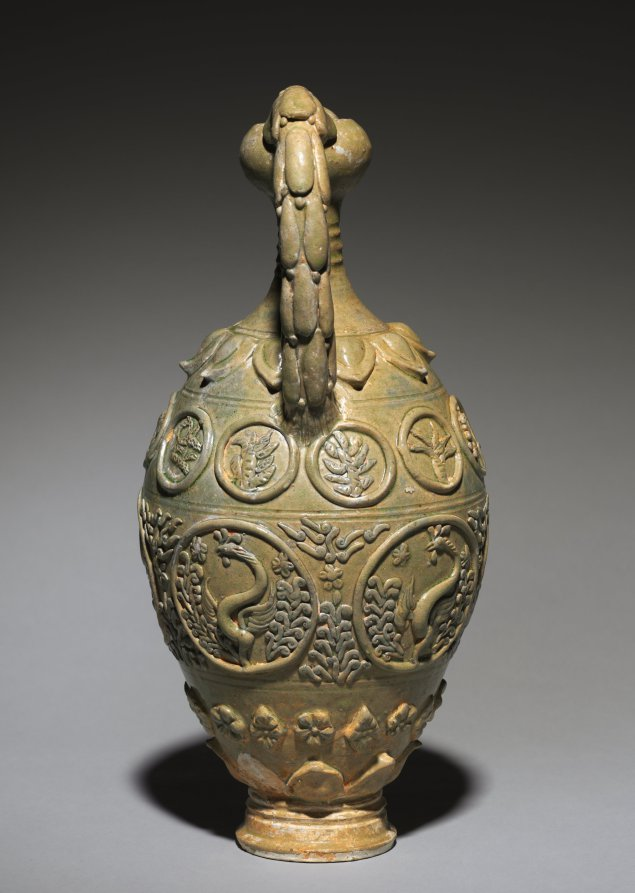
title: Bird-Headed Ewer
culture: China, probably Henan province, Tang dynasty (618-907)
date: 600s–700s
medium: green-glazed stoneware with modeled, molded, and applied decoration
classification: Ceramic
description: With a lobed body, a bird-shaped head, and a birdfeather loop handle, this ewer is derived from West and Central Asian metalwork: Tang potters adopted foreign shapes (bird-headed ewer and amphora) and foreign motifs (floral medallions, vines, palmette, and roundel designs) with great freedom. The artistic expressions bespoke the confidence and spirit of the period. This work is a representation of northern celadon, although it is commonly believed that the northern kilns specialized in white wares and the southern kilns in green wares (notably, Yue celadon). It continues the tradition of celadon production in the north during the late Northern Dynasties period in the 500s.